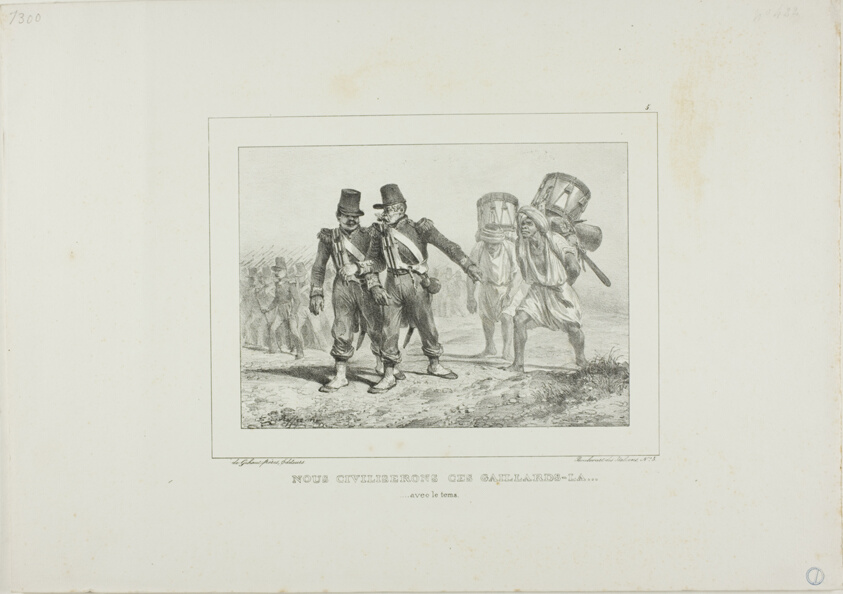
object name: Print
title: We Will Civilize those Fellows... with Time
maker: Denis Auguste Marie Raffet (French, 1804-1860); printed by Chez Gihaut Frères (French, 19th century)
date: 1836–37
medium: Lithograph in black on ivory wove paper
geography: France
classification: lithograph; print; prints and drawing